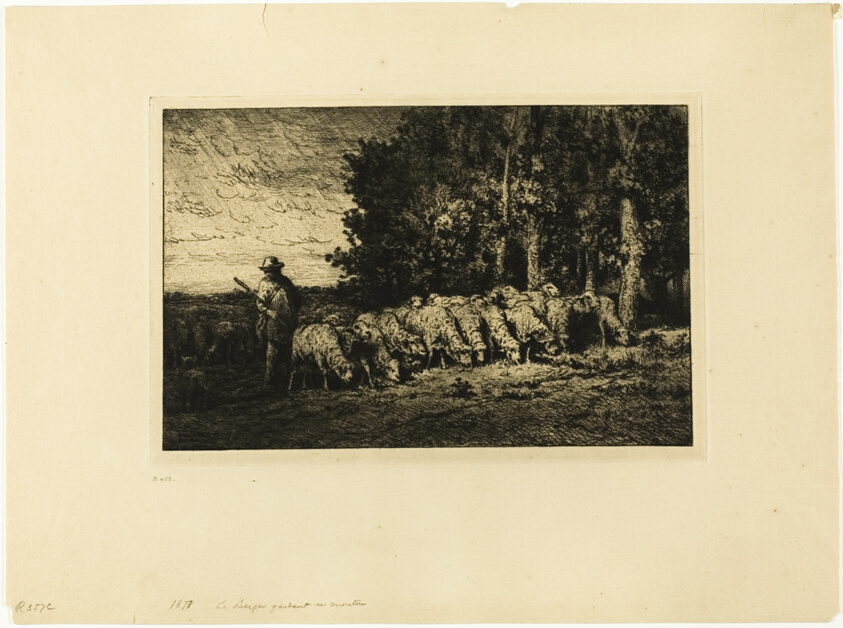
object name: Print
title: Flock of Sheep at the Edge of a Wood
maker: Charles Émile Jacque (French, 1813-1894)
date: 1877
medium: Etching and aquatint on cream laid paper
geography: France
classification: etching; print; prints and drawing